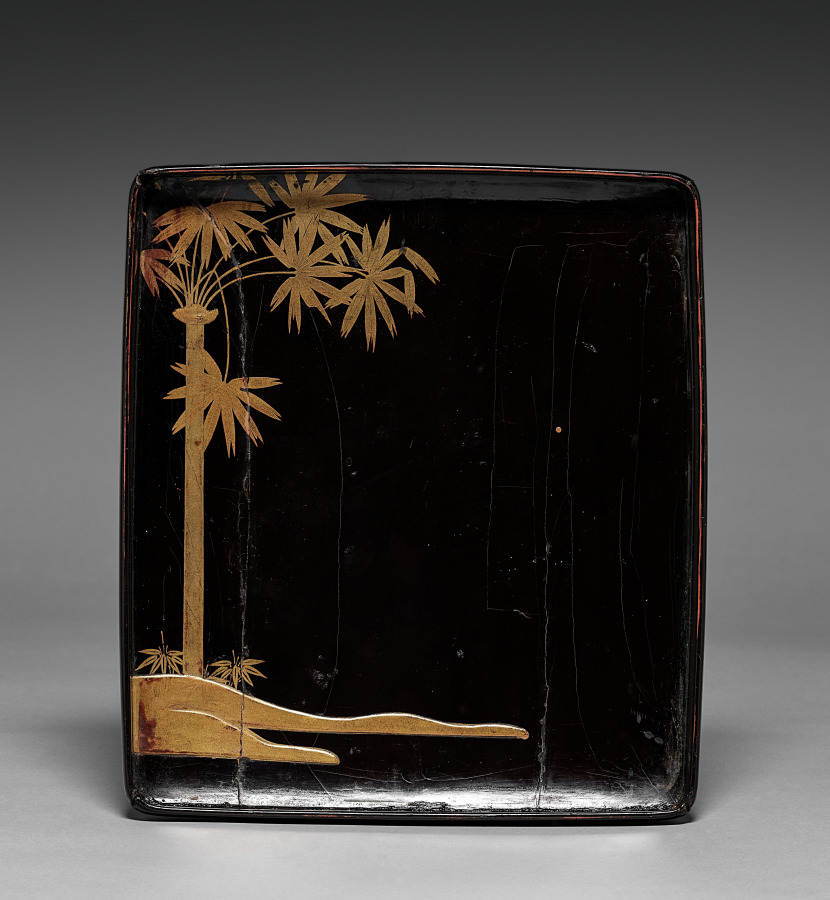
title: Writing Box (Suzuribako) with Europeans (lid)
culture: Japan, Edo period (1615–1868)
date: 1800s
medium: lacquered wood with gold maki-e, silver inlay and red lacquer on black ground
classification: Lacquer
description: For many Japanese patrons, objects decorated with images of foreigners offered the rare opportunity to see westerners. The two men on the left were likely Portuguese traders, identifiable by their balloon-shaped pants. The man on the right is a Jesuit priest. Portuguese traders arrived in Japan in 1543 and soon after Christian missionaries began to create outposts there. By the early 17th century, Christianity was outlawed and the Portuguese were forced out of Japan. This object was created during the short period when the Portuguese were allowed in Japan.